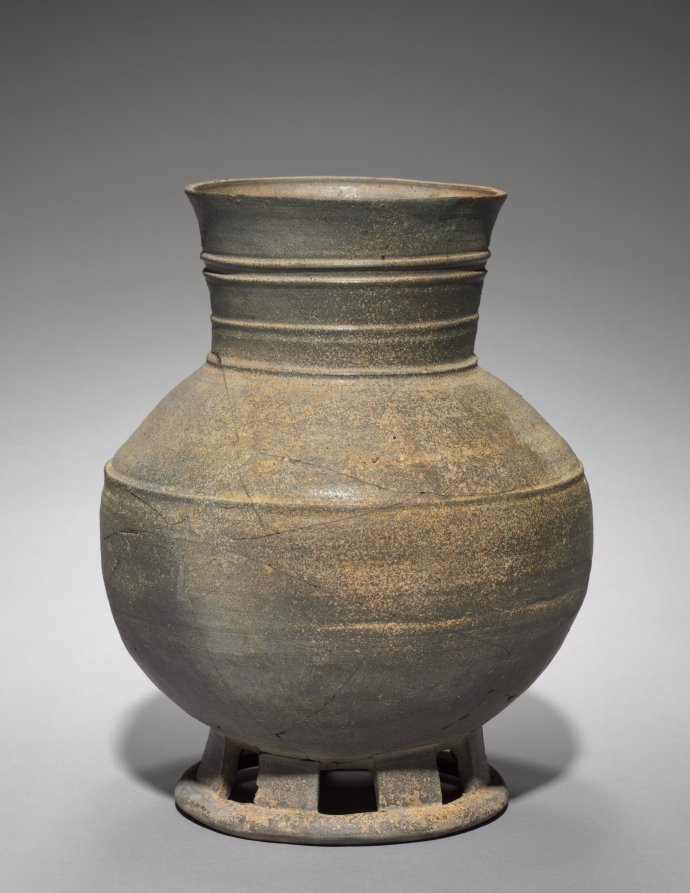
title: Long-necked Jar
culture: Korea, Silla (57 BCE–935 CE)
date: 200s–300s CE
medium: gray pottery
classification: Ceramic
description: Pottery vessels with a footed stand, such as this one, are the earliest known high-fired ware produced in closed kilns built on hillsides. Its gray color is the result of the reduction of oxygen in the kiln chamber. Footed vessels were not practical enough for everyday use, but were used to present offerings to the deceased in highly elaborate ritual ceremonies.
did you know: Closed kilns built on hillsides became widely used for producing this type of pottery vessel in Korea during the Three Kingdoms period.